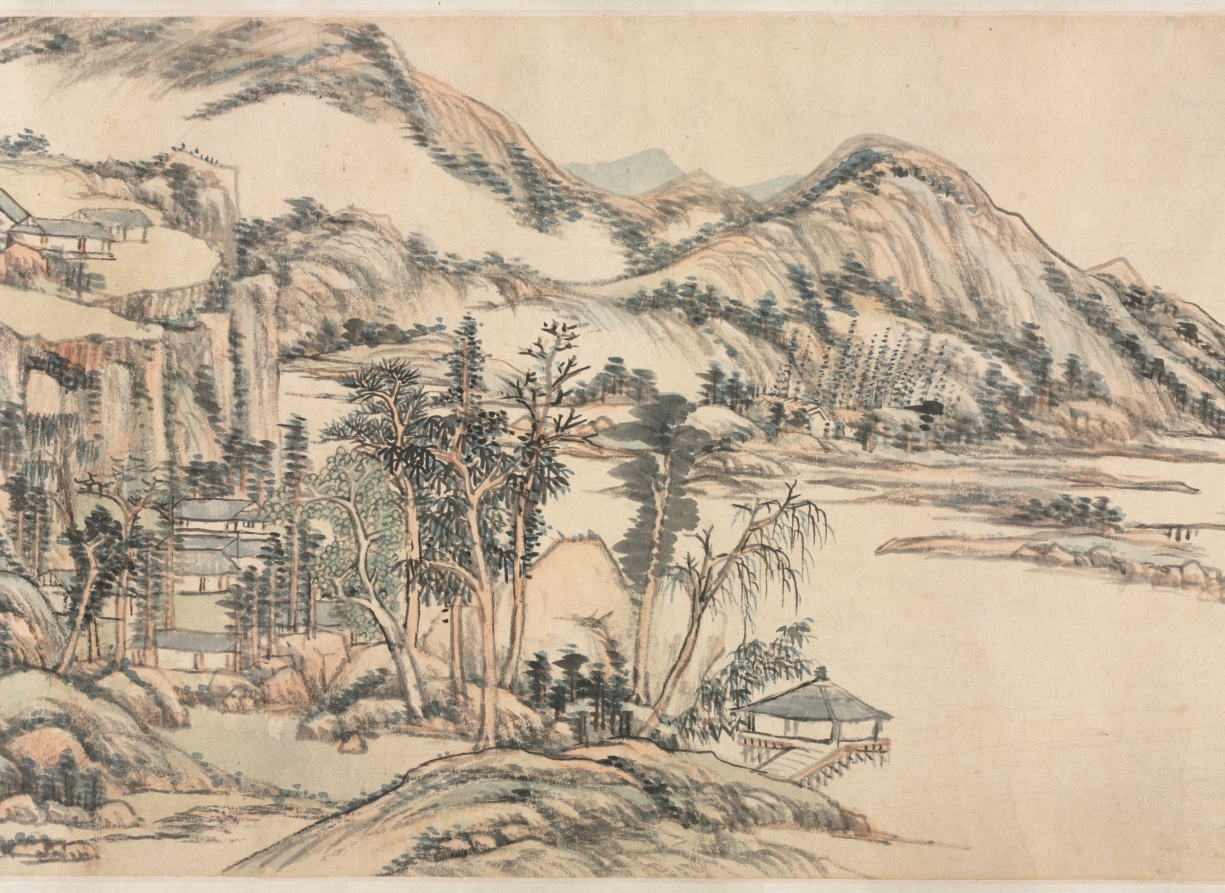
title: Green Peaks under Clear Sky: After Huang Gongwang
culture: China, Qing dynasty (1644-1911)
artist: Wang Yuanqi (Chinese, 1642–1715)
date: 1703–8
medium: handscroll; ink and light color on paper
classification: Painting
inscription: 晴巒霽翠：倣黃子久。麓臺。[印]石師道人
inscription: [印] 御書畫圖留與人看. 子久畫於宋諸大家荊、關、李、范、董、巨，無所不有。運筆不假修飾。皴法由淡入濃，化諸家之迹者也。澹明徐君偶見縮本，臨摹六幅。囑余參以富春大意，成一長卷。余夙夜在公，乘暇偶一點染。至戊子九秋告竣，閱四、五年矣。昔大癡為無用師作富春卷，七年而成，為千古鉅觀。今拙筆癡鈍。亦淹留至此。可為識者噴飯矣。王原祁題。[印]王原祁印; 麓臺 [印, 畫芯左下] 西廬後人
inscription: 3 additional colophons and 15 additional seals: 1 colophon and 9 seals of Yang Shicong 楊士驄 (b. 1870); 1 colophon of Wu Hufan 吳湖帆 (1894–1968); 1 colophon and 1 seal of Wu Mei (20th c.); 5 seals of Cheng Qi 程琦 (1911–1988).